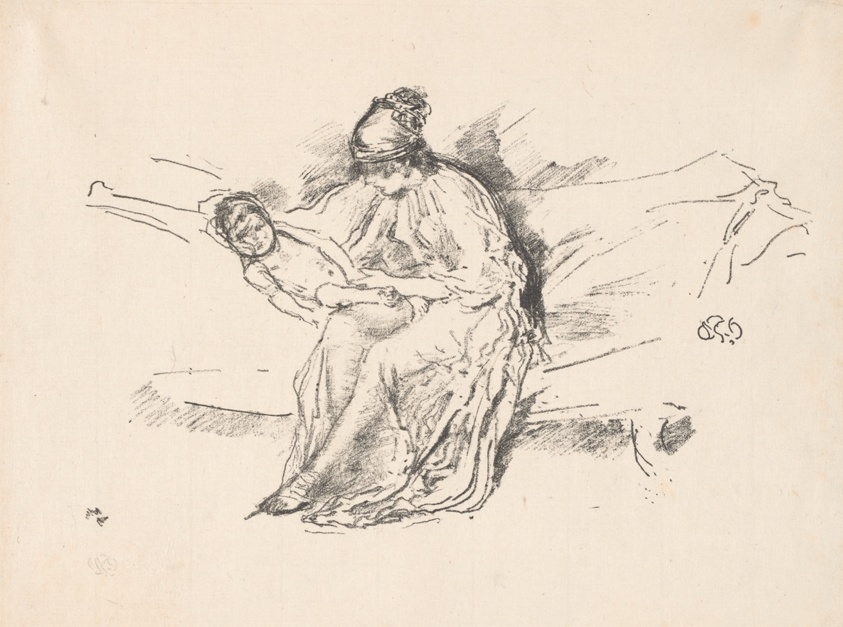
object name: Print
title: Mother and Child, No. 4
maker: James McNeill Whistler (American, 1834-1903)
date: 1891, printed 1895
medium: Transfer lithograph in black on ivory Japanese paper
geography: United States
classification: transfer lithograph; lithograph; print; prints and drawing; paper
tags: mothers, children